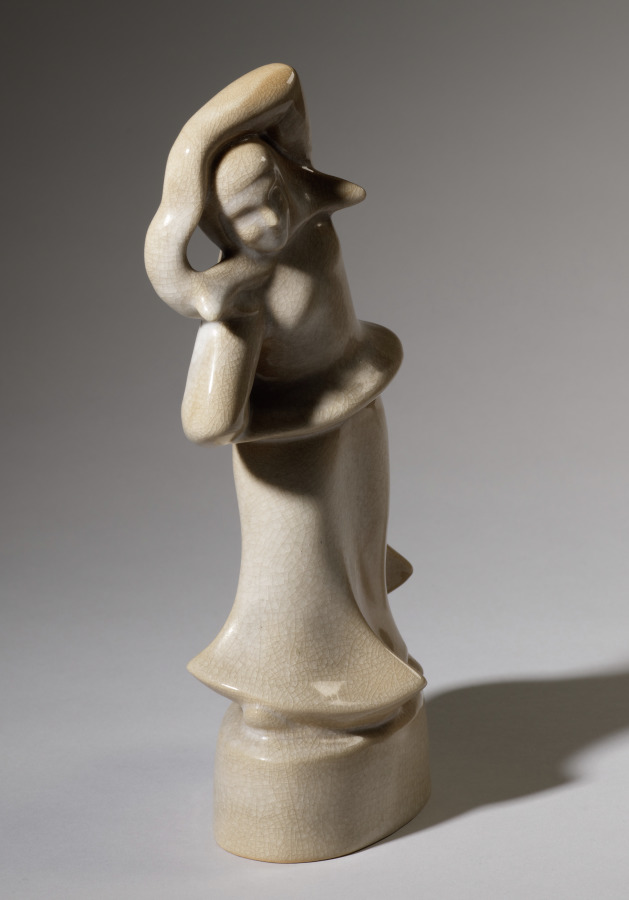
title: Dancer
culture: America, Ohio, Cleveland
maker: Cowan Pottery Studio (America, Rocky River, Ohio, 1920–1931)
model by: Alexander Blazys (American, born Russian Empire [now Lithuania], 1894–1963)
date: 1927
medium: mold-made ceramic, glazed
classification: Ceramic